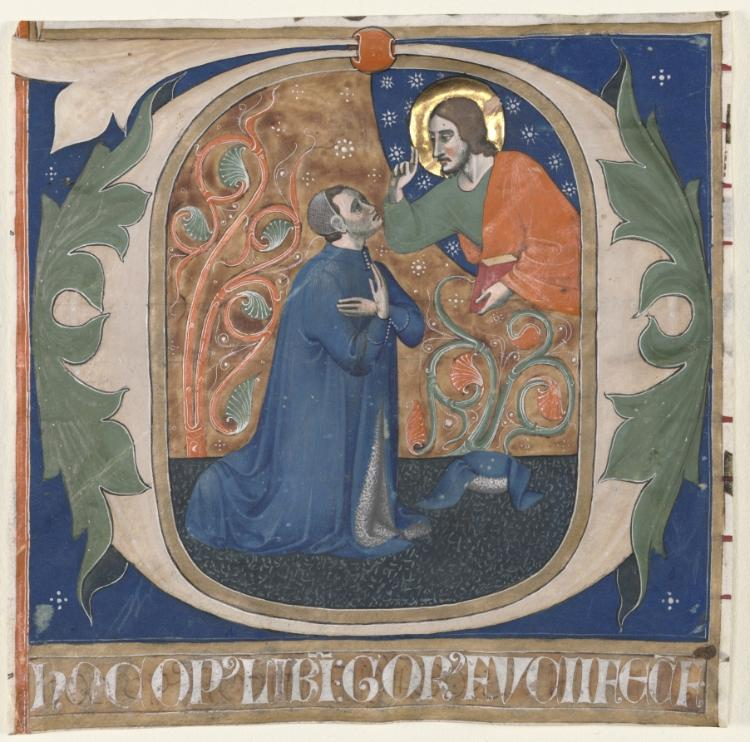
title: Historiated Initial (O) Excised from an Antiphonary: The Donor, Gorus Fucci, Kneels before Christ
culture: Italy, Arezzo(?)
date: c. 1300–1350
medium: ink, tempera, and gold on parchment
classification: Manuscript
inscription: hoc op[us] lib[r]i: gor[us] fvcii fec[it] f[ieri]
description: This miniature shows Gorus Fucci kneeling before Christ. His clothes characterize him as a member of the wealthy urban noble class. He wears a contemporary coiffe, a leather headgear, while his hat lies before him. The inscription translates as “Gorus Fucci had this work of a book made.” This manuscript was probably written shortly before the great plague and may have been donated to an ecclesiastical foundation. Pious foundations did not necessarily decline in the wake of the plague: new urban elites from outside emerged as benefactors, primarily focused on social institutions.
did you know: The gentleman here has respectfully taken off his hat as he kneels before Christ. On his head remains a coif, a close- fitting cap worn by both men and women beneath hats as well as on its own.